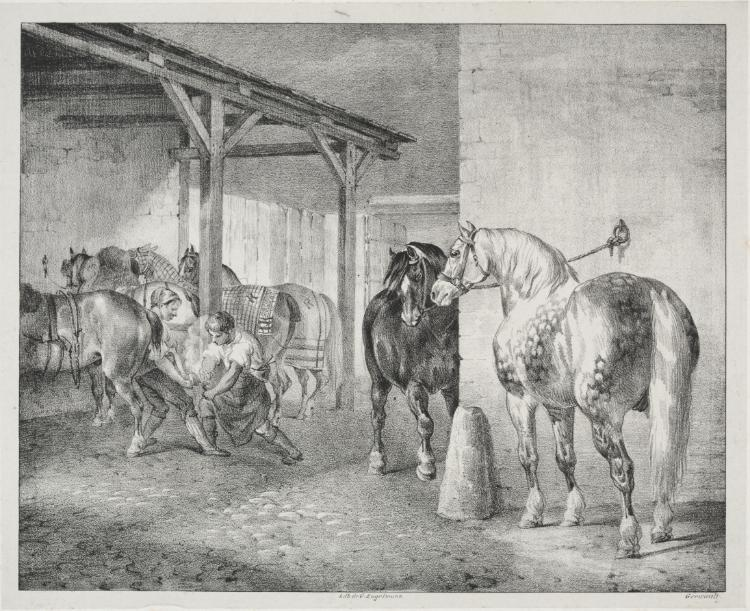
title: The Ferrier's Shed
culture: France, 19th century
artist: Théodore Géricault (French, 1791–1824)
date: 1823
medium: lithograph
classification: Print